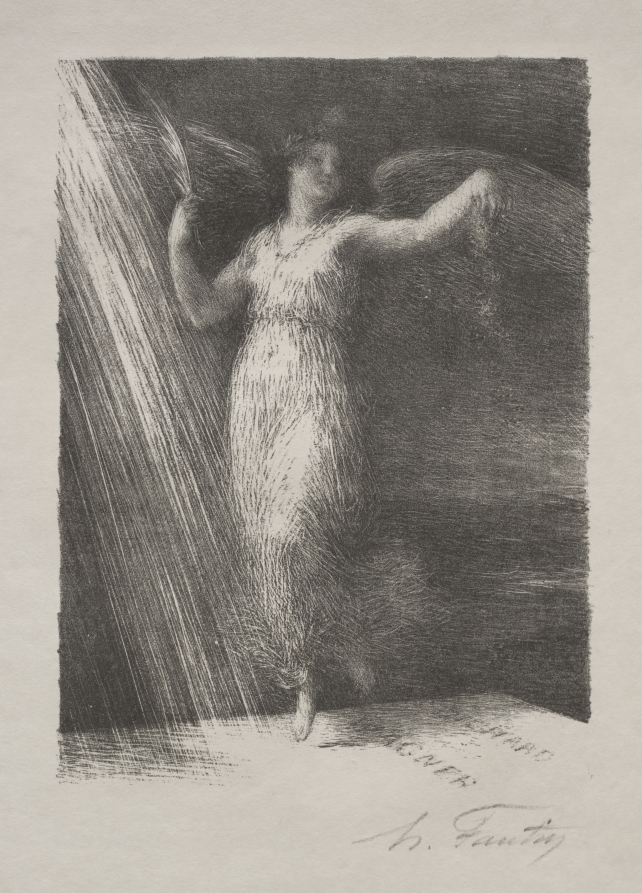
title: Awakening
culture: France, 19th century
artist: Henri Fantin-Latour (French, 1836–1904)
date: 1886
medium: lithograph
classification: Print